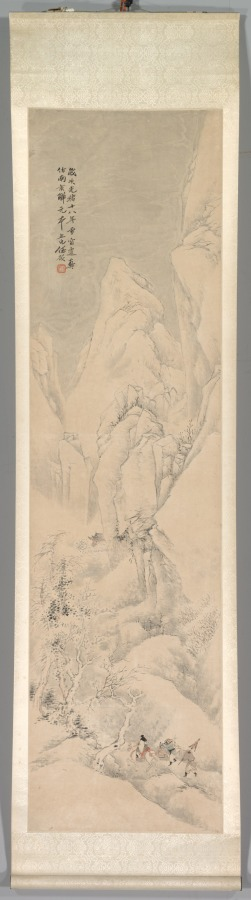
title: Landscape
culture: China, Qing dynasty (1644-1911)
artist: Ren Yu (Chinese, 1853–1901)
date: 1892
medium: Hanging scroll; color on paper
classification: Painting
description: This seasonal landscape is from a set of four hanging scrolls by Ren Yu. He was the youngest, most eccentric, and least prolific of the Four Rens, a family of prominent painters in Shanghai during the late Qing dynasty (1644–1911). Perhaps due to his opium habit and subsequent financial difficulties, Ren Yu tended to be lackadaisical in his work. The few remaining high-quality paintings hint at his artistic potential lost to opium. Though Ren’s premature death left his artistic promise unfulfilled, his paintings were acquired and donated to the museum by Charles Lang Freer (1854–1919), a wealthy businessman and art collector from Detroit. As Freer had hoped, this donation of Ren Yu paintings inspired the young Cleveland Museum of Art to continue to expand its own Chinese painting collection.